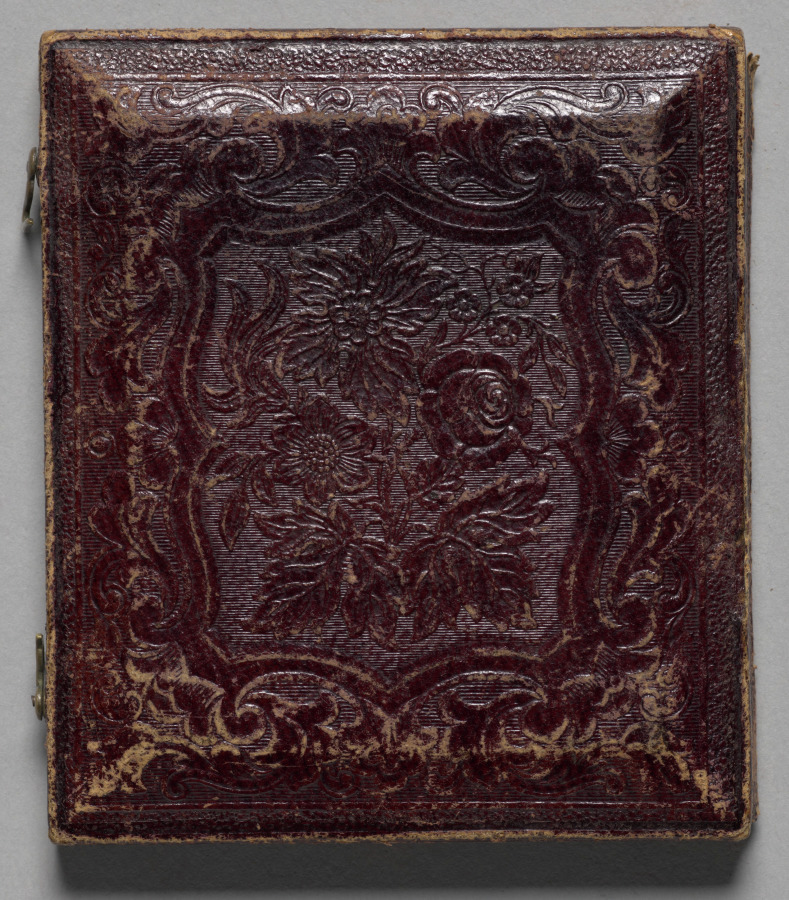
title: Boy with hobby horse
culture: America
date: c. 1862–65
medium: ambrotype, tinted, sixth plate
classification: Photograph